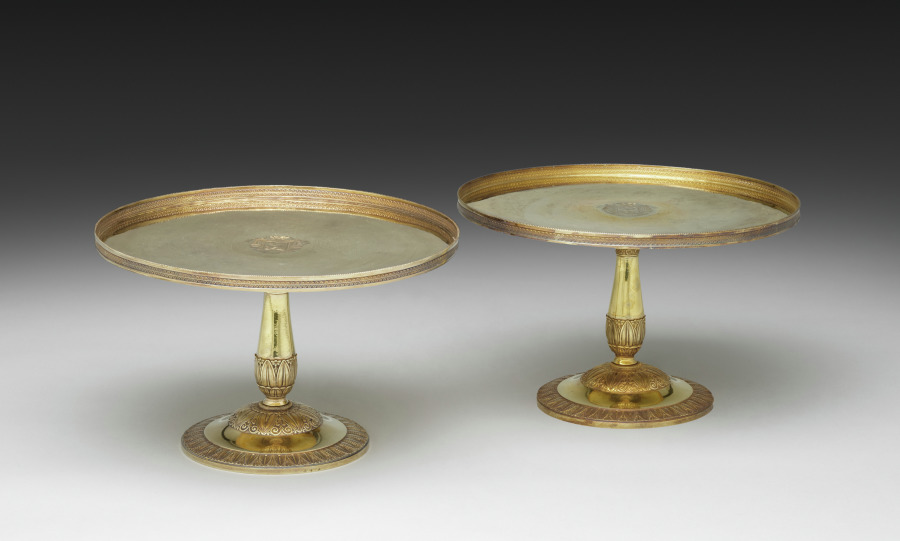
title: Pair of Tazza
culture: Italy, Rome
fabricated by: Pietro Paolo Spagna (Italian, 1793–1861)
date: c. 1815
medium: silver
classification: Silver